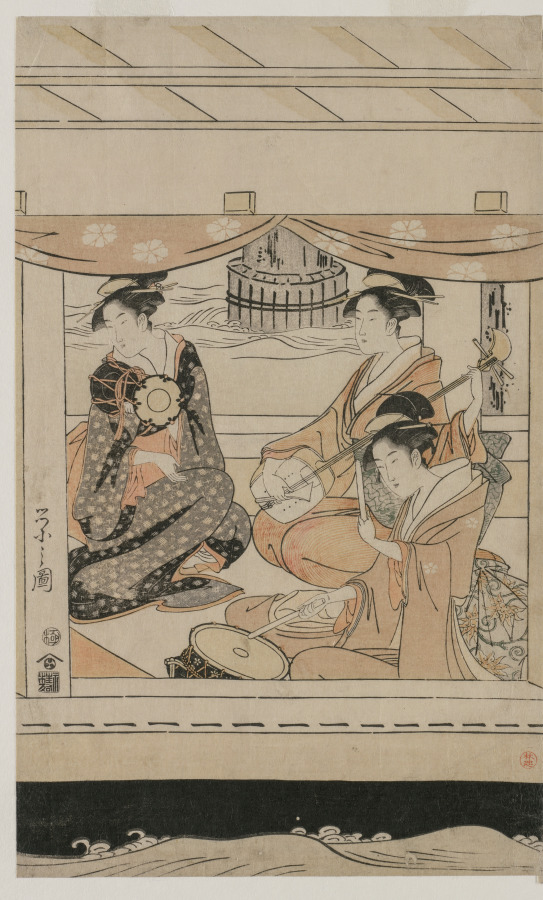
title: Party on the Pleasure Boat Kawaichimaru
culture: Japan, Edo period (1615–1868)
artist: Chōbunsai Eishi (Japanese, 1756–1829)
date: c. 1796–97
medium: One of a pentaptych of color woodblock prints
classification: Print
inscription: Signature: Eishi zu Seal: kiwame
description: A pleasure boat named Kawaichimaru is filled with entertainers in this expansive scene. At the vessel’s right end, a young dancer waits as her costume’s hat is arranged. In the middle, a trio of musicians performs, two on drums and another on shamisen, a three-stringed instrument. Listening to them is an elegant woman smoking her pipe. At the left end, three women, one on a neighboring boat, enjoy a spectacular floral arrangement of pine, lily, and iris on a lacquer stand.